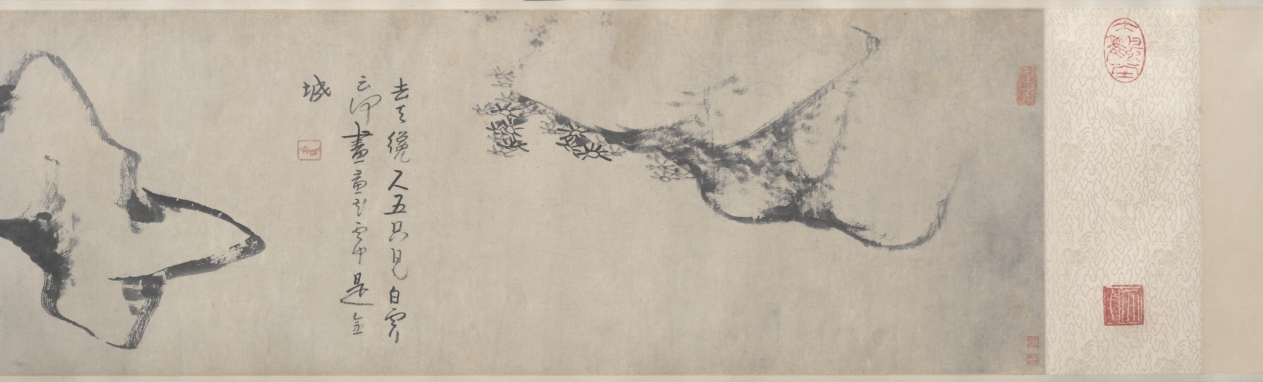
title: Fish and Rocks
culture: China, Qing dynasty (1644-1911)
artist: Bada Shanren (Chinese, 1626–1705)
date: mid- to late 1600s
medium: Handscroll; ink on paper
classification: Painting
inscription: 去天纔尺五，只見白雲行。 云何畫黃花，雲中是金城。 [印] 个山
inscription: 雙井舊中河，明月時延佇。 黃家雙鯉魚，為龍在何處。 [印] 个山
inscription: 三萬六千頃，畢竟有魚行。 到此一黃頰，海潮次上笙。 [印] 个山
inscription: 5 additional seals: 2 of Zhang Daqian 張大千 (1899–1983); 1 of Ta-an Chü-shih; 2 unidentified.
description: Bada Shanren, also called Zhu Da, a 17th-century painter who rejected conventions in favor of an individual, personal expression, is known for his unorthodox compositions of fish, flowers, birds, and rocks. Fish in his paintings are often looking upward toward heaven, swimming in a pond of undefined space. As a member of the Ming imperial family, Zhu Da lost his princely status and hid in a monastery when the Manchus, foreigners from the north, established the Qing dynasty in 1644. This scroll may have some autobiographical meaning, representing fish as leftover subjects (yimin) who lived in a void, having lost their roles in life after the fall of the dynasty.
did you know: After each poem, Bada Shanren used his so-called jixingyin seal 屐形印, which resembles the impression of a shoe on soft mud.